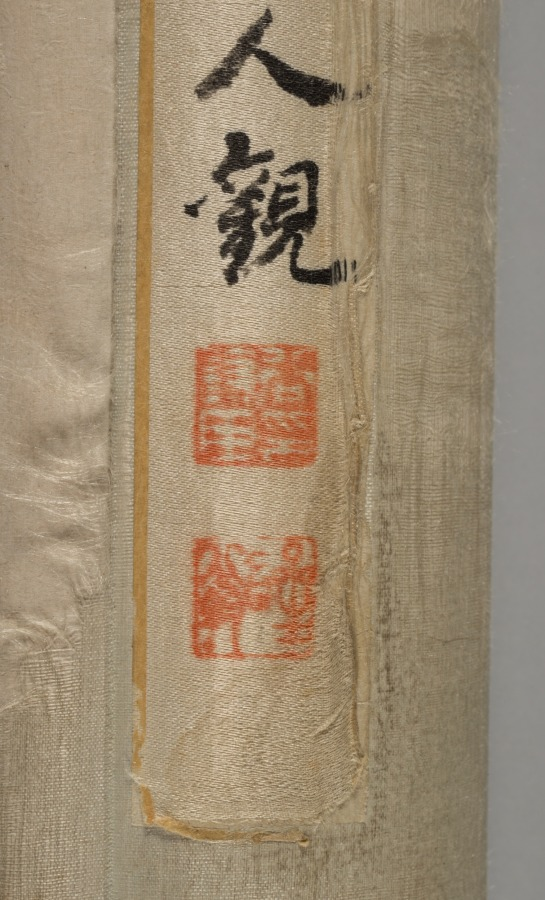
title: Mountain View and Blue Water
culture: Japan, Edo period (1615–1868)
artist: Tanomura Chikuden (Japanese, 1777–1835)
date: early 1800s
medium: hanging scroll; ink, color, and gold on paper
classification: Painting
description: Tanomura Chikuden was an eminent painter whose adopted son, Tanomura Chokunyū (1814–1907), was Seifū Yohei III’s painting teacher. This work was displayed at a gathering commemorating the 10th anniversary of Chokunyū’s death, something we know only because its custom-made box and archival documents have been carefully kept together. The box inscription also confirms that Chikuden was emulating the style of the Mi family of painters, active during China’s Southern Song dynasty (1127–1279). The painting’s Chinese-style silk wrapper is inscribed and sealed on its interior by members of Chokunyū’s community.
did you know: The mountain shapes are built up with multiple small wet strokes.